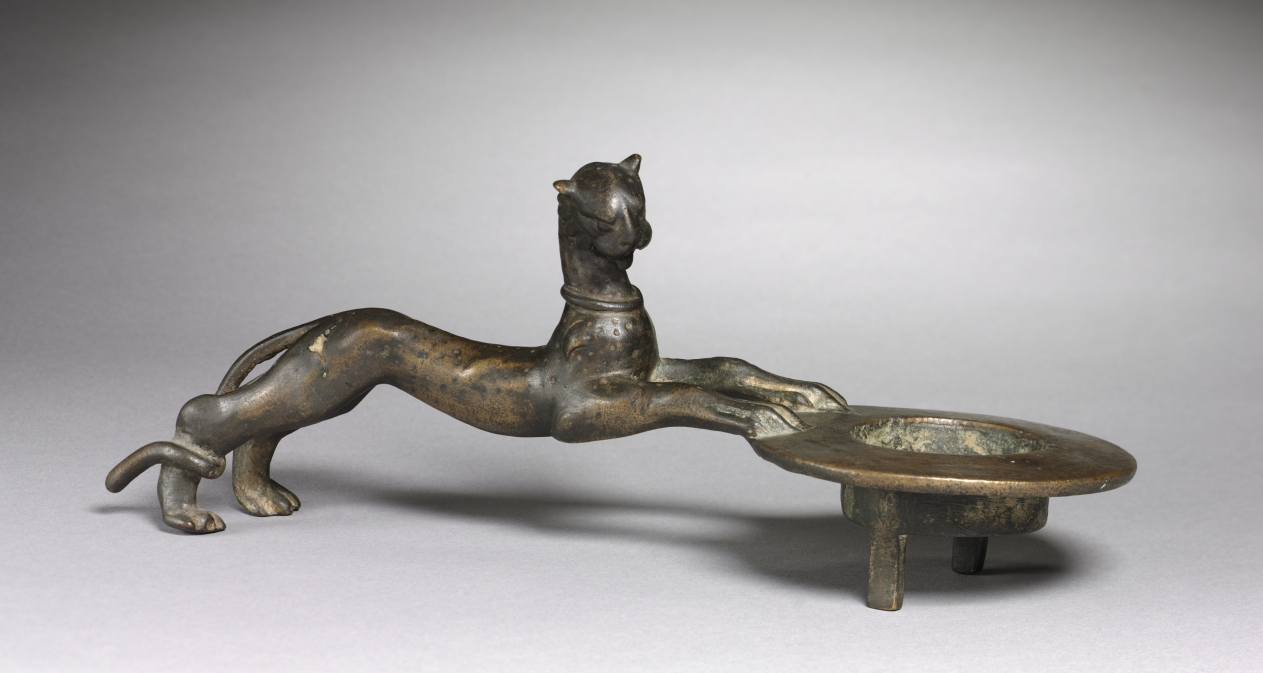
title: Feline-Handled Incense Burner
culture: Burudjird(?), Parthian Empire (247 BCE–224 CE)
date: c. 100 CE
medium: bronze, cast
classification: Metalwork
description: The Parthians were a world power rivaling the Romans from 100 BC until about AD 200. They were succeeded in Iran by the Sasanians.